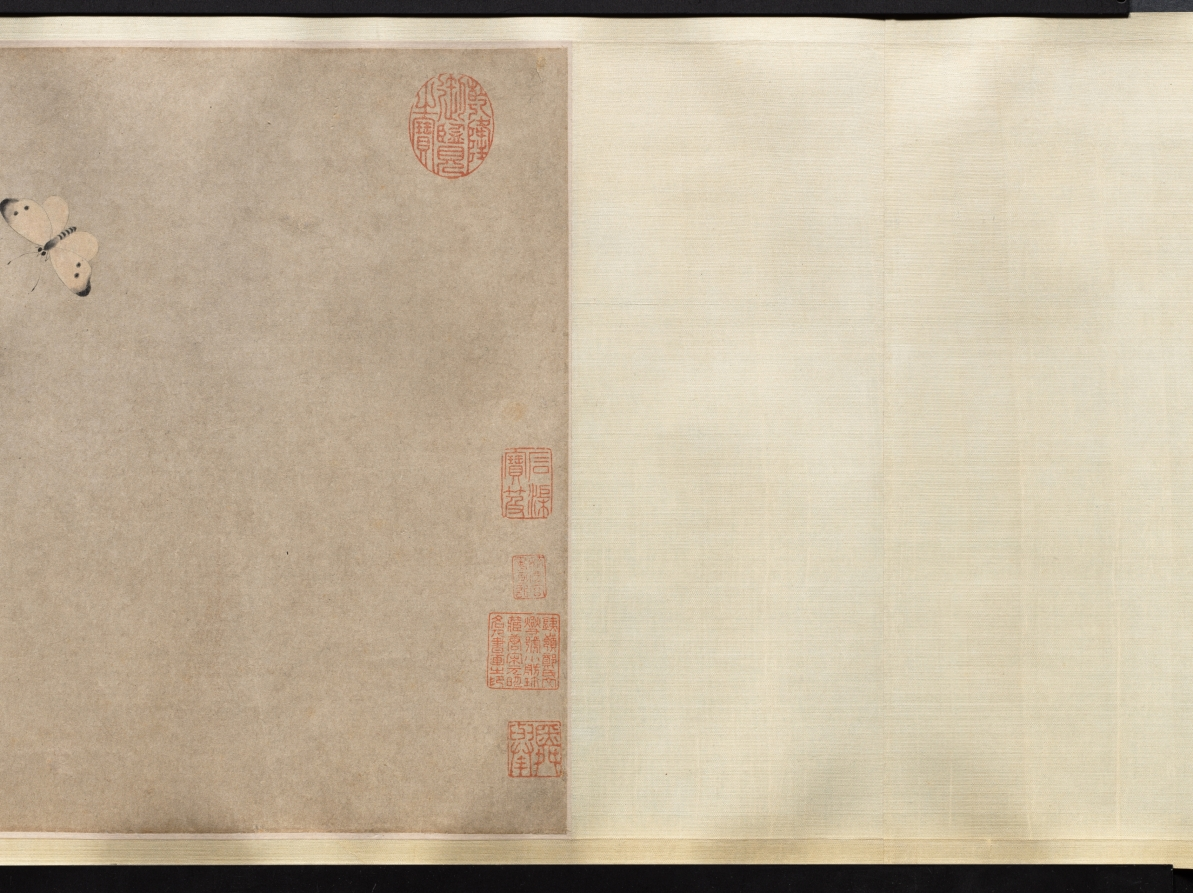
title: Insects and Flowers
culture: China, Qing dynasty (1644-1911) or Republican period (1912-49)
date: c. 1900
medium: Handscroll, ink and color on paper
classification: Painting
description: More than 26 feet long, this scroll presents insects, reptiles, and plants in delicate brushwork and pale colors, referring in style to earlier Southern Song dynasty (1127–1279) bird-and-flower paintings. Upon closer inspection, ants dismember a butterfly and reptiles wait to ambush their prey. An inscription at the end of the painting gives us an idea of its meaning: Attributed to the Qing dynasty scholar Zhang Xigeng (張錫庚, 1801–1861), the inscriber relates the work to an earlier painting by Qian Xuan (錢選, c. 1235–before 1307) and further suggests that the painting may allude to the relentlessness of natural selection. By drawing a parallel to tumultuous episodes in Chinese history, the writer might even hint at the domestic rebellions and the aggression of Western powers against China in his lifetime, particularly the Opium Wars (1839–60).